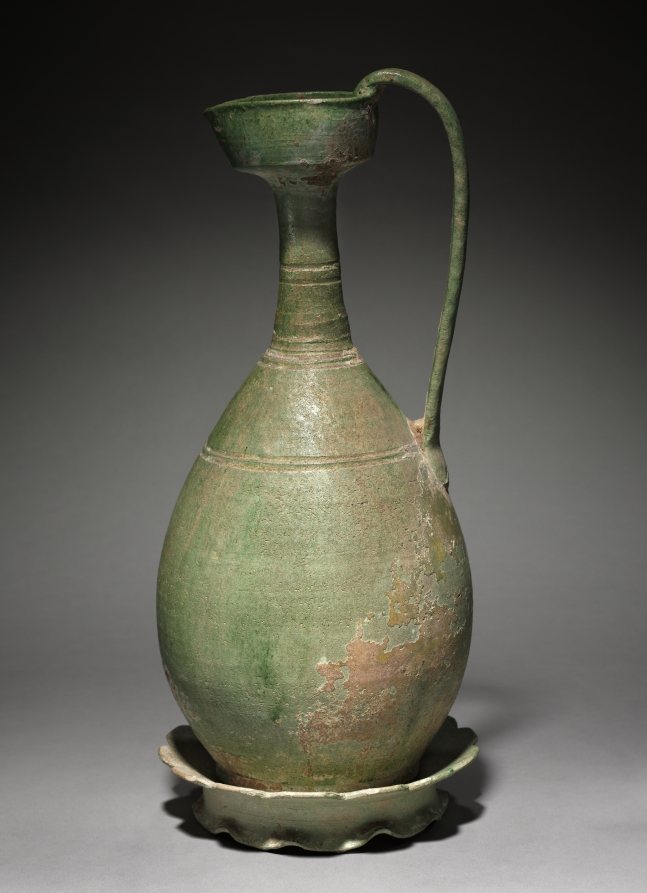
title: Ewer with Corolla Base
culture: China, Manchuria, Liao dynasty (916-1125)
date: 907–1125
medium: pottery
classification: Ceramic